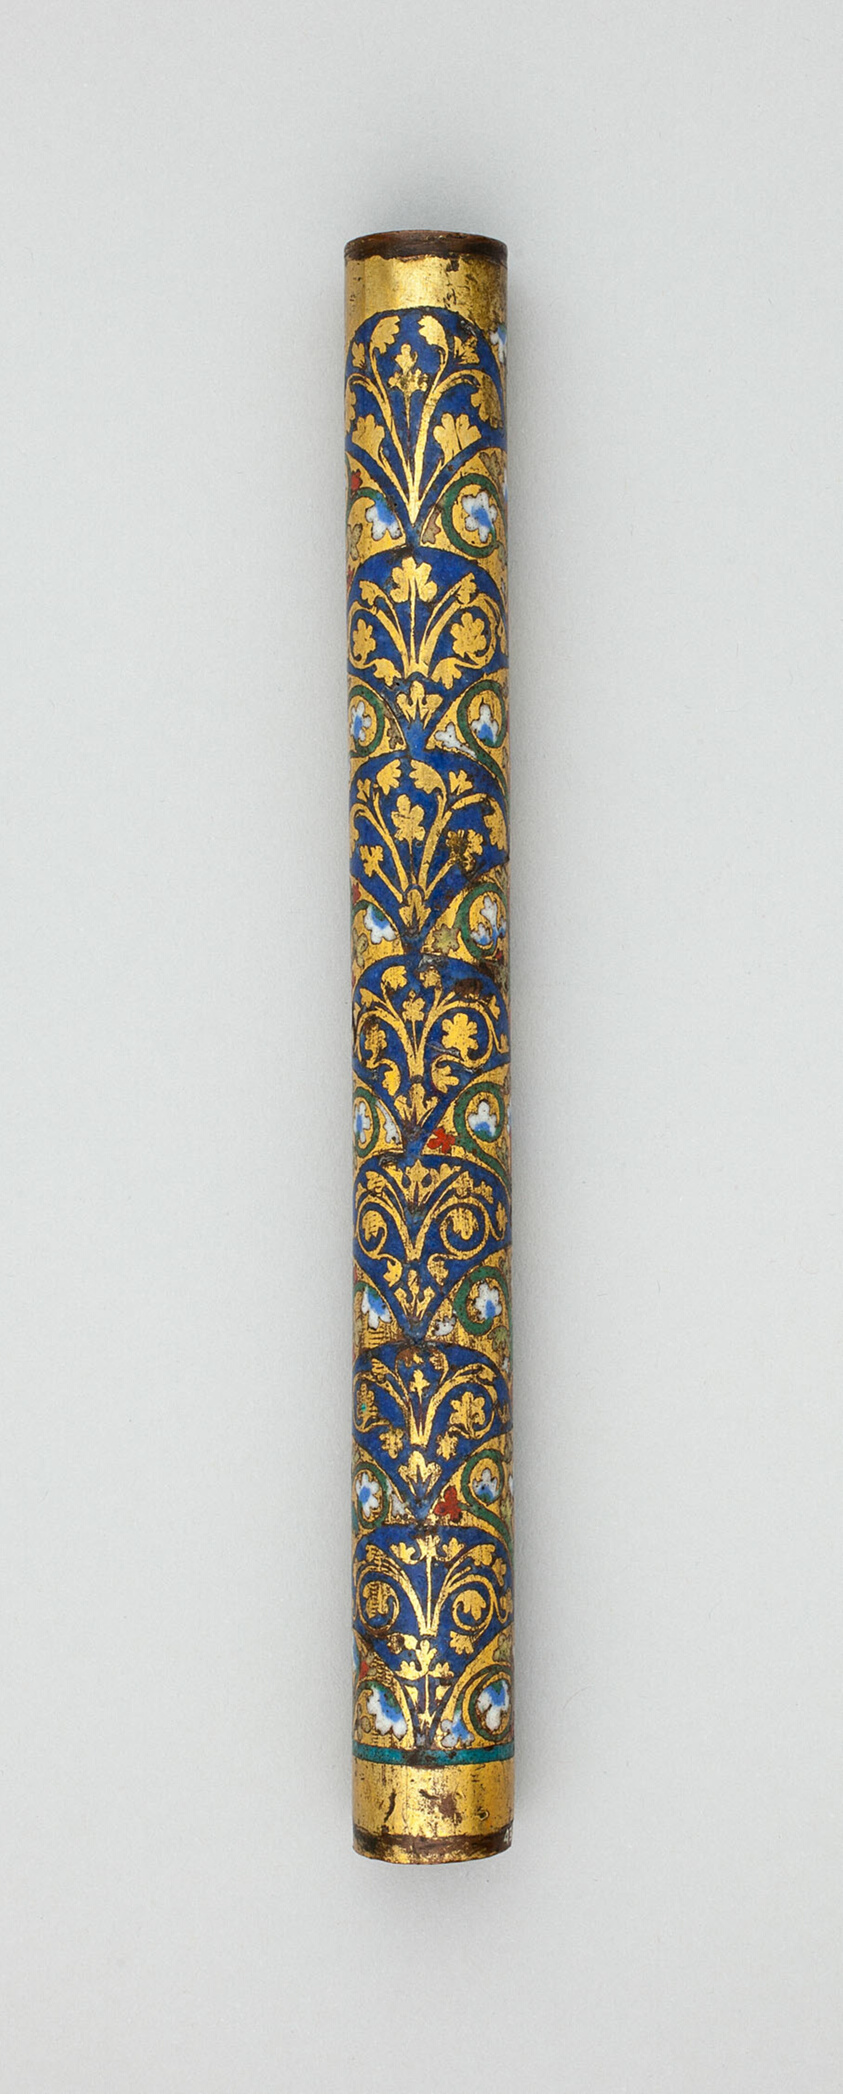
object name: Decorative Arts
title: Shaft of a Column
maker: German; Rhineland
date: 1175/1200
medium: Gilt bronze, champlevé enamel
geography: Rhineland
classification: enamel; european decorative arts; decorative arts